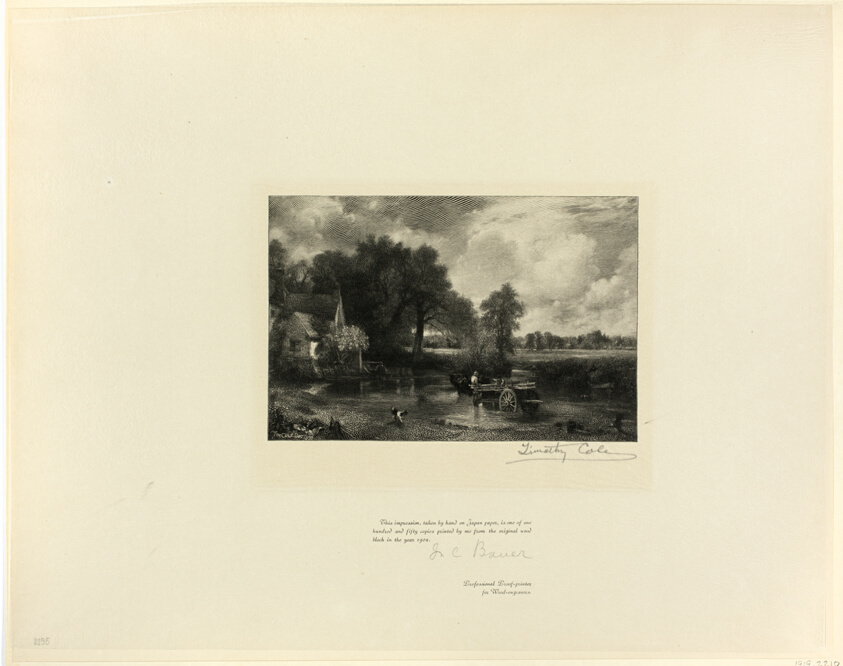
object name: Print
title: The Hay Wain, from Old English Masters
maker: Timothy Cole (American, born England, 1852-1931); after John Constable (English, 1776-1837)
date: 1900, printed 1902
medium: Wood engraving on chine paper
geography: United States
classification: wood engraving; print; prints and drawing